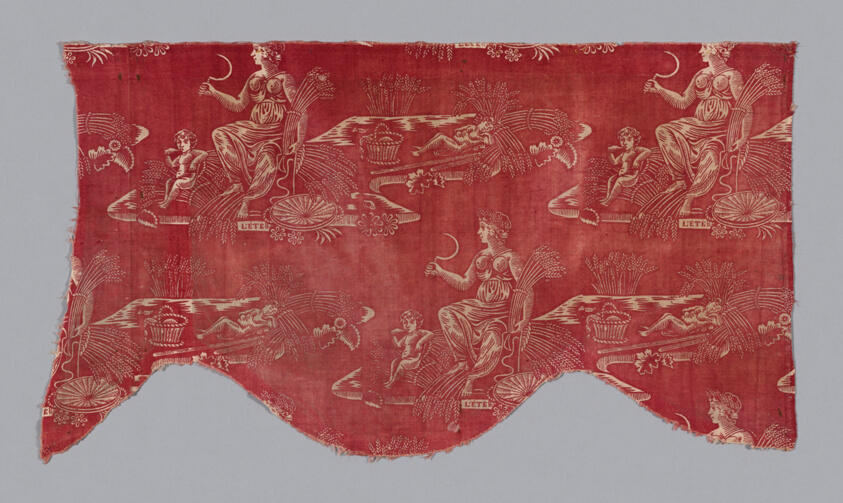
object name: Textile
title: L'ete (Summer) (Furnishing Fabric)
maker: France, Normandy, Bolbec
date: c. 1820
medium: Cotton, plain weave; resist printed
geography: Bolbec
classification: textile; weaving - printed; furnishing textile